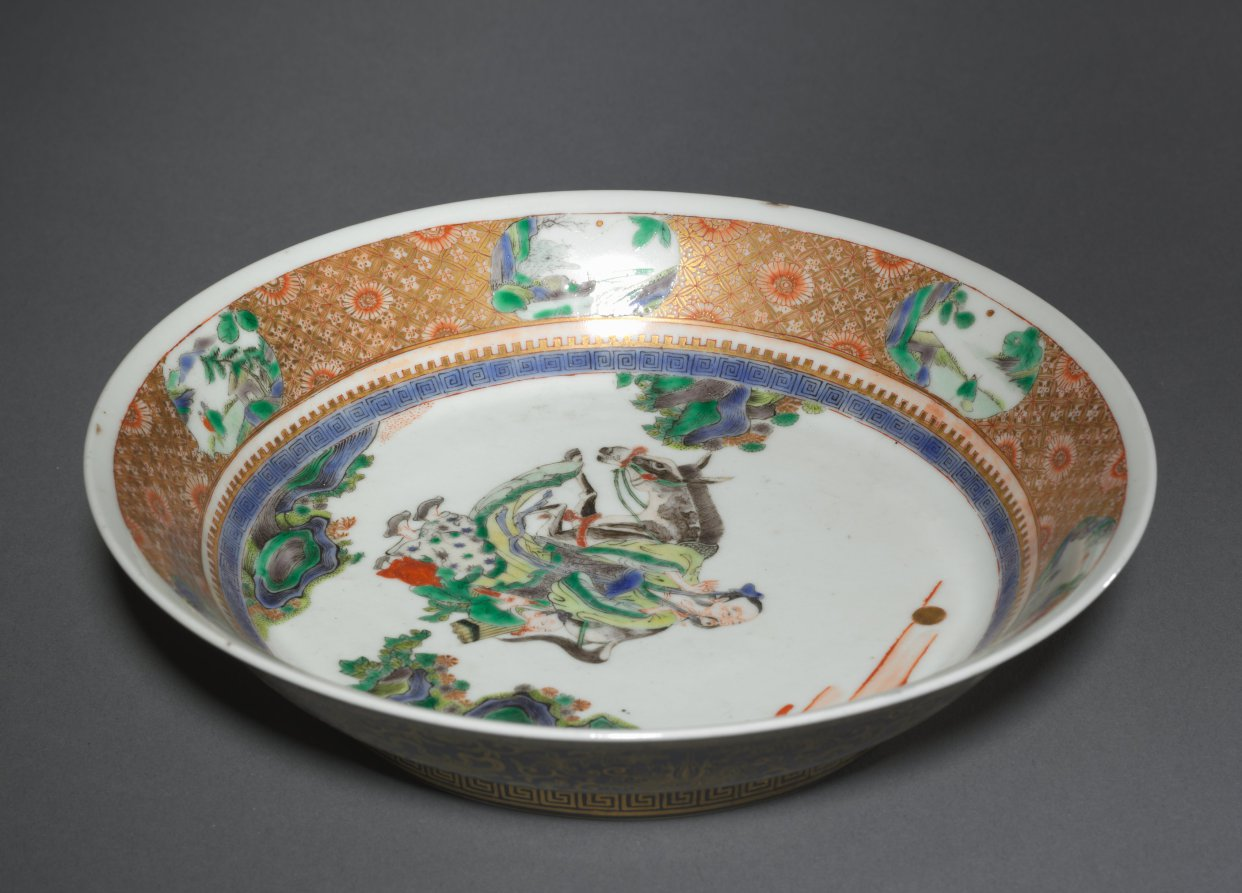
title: Dish with Zhang Guolao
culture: China, Jiangxi province, Jingdezhen kilns, Qing dynasty (1644-1911), Kangxi reign (1662-1722)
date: 1662–1722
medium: porcelain with famille verte overglaze enamel and painted gold decoration (interior) and powder blue glaze with painted decoration (exterior)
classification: Ceramic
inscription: 大清康熙年製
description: Zhang Guolao, featured on this dish, is one of the Eight Immortals and a gifted magician who was believed to know the secret arts to obtain longevity. Typically depicted as an old man and accompanied by his mule, he is the patron saint of artists. His mule is said to be magical; it can be folded up like a piece of paper to fit into a small bag. The central scene is framed by a sumptuously gold-decorated rim showing spaces reserved for landscape scenes in primarily fresh blue and green colors.